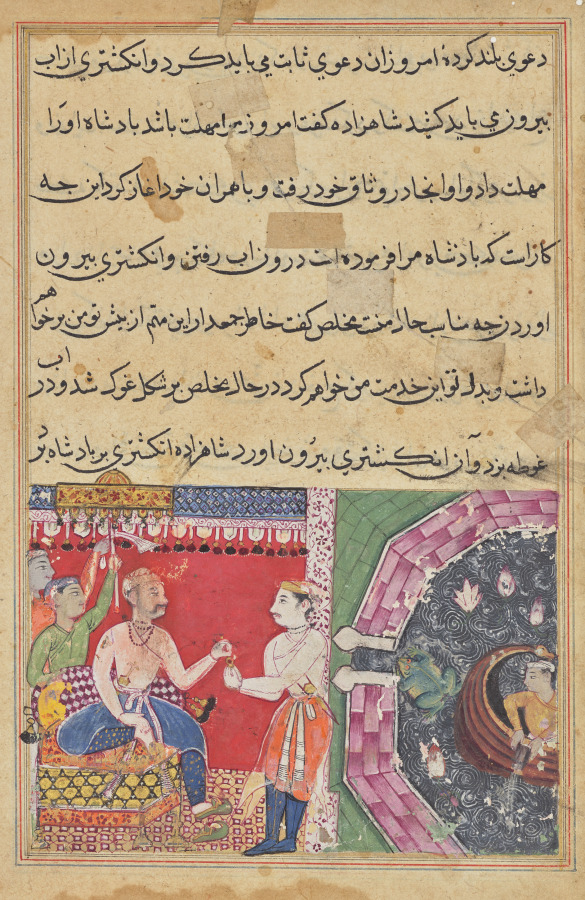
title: The prince, with the help of Mukhlis who changes into a frog, recovers the ring lost in the sea, and returns it to the king, from a Tuti-nama (Tales of a Parrot): Eighteenth Night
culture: Mughal India, court of Akbar (reigned 1556–1605)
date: c. 1560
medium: gum tempera, ink, and gold on paper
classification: Painting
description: The prince arrived at a royal capital, where he pledged to assist the local king in any tasks. One day, when fishing at sea, the king dropped a precious ring into the water. The prince asked his servant, the frog, to retrieve it. At the left, the prince respectfully returns the ring to the king on his throne. The frog is at the entrance of the walled harbor to the sea, where a boatman bails water. Lotus flowers have been painted among the swirling eddies.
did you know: The sea where the king dropped his ring is represented here as a walled pool.